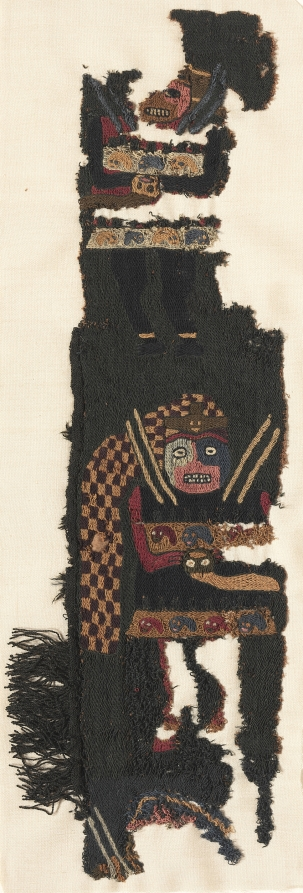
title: Fragment of a Border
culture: Peru, South Coast, Paracas, Late Period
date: 300–100 BCE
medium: cotton plain cloth embroidered in wool outline stitch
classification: Textile